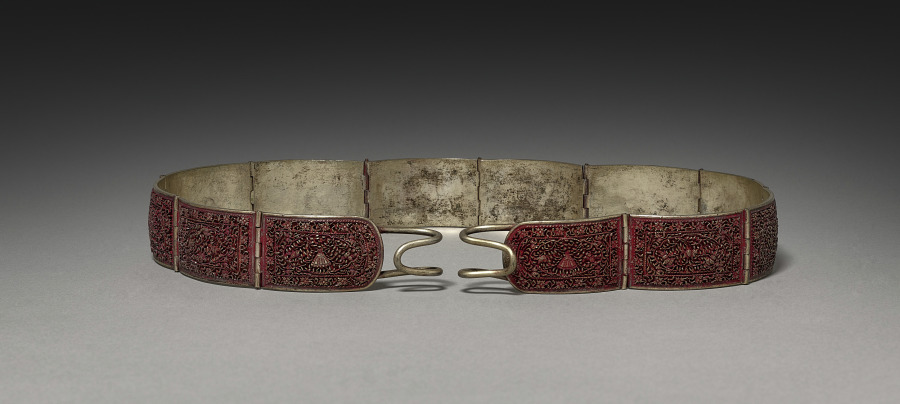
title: Belt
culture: Siam, 19th century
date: 1800s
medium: brass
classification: Jewelry